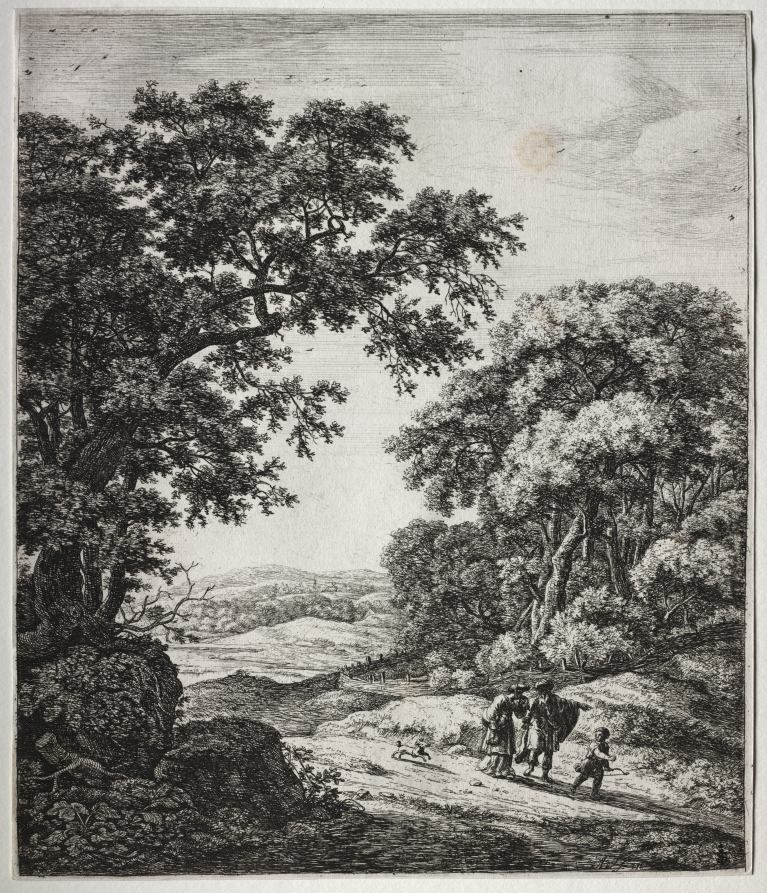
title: Six large upright landscapes with scenes from the Old Testament: Abraham Dismissing Hagar and Ishmael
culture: Netherlands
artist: Anthonie Waterloo (Dutch, 1609/10–1690)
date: 1640–90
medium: etching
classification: Print